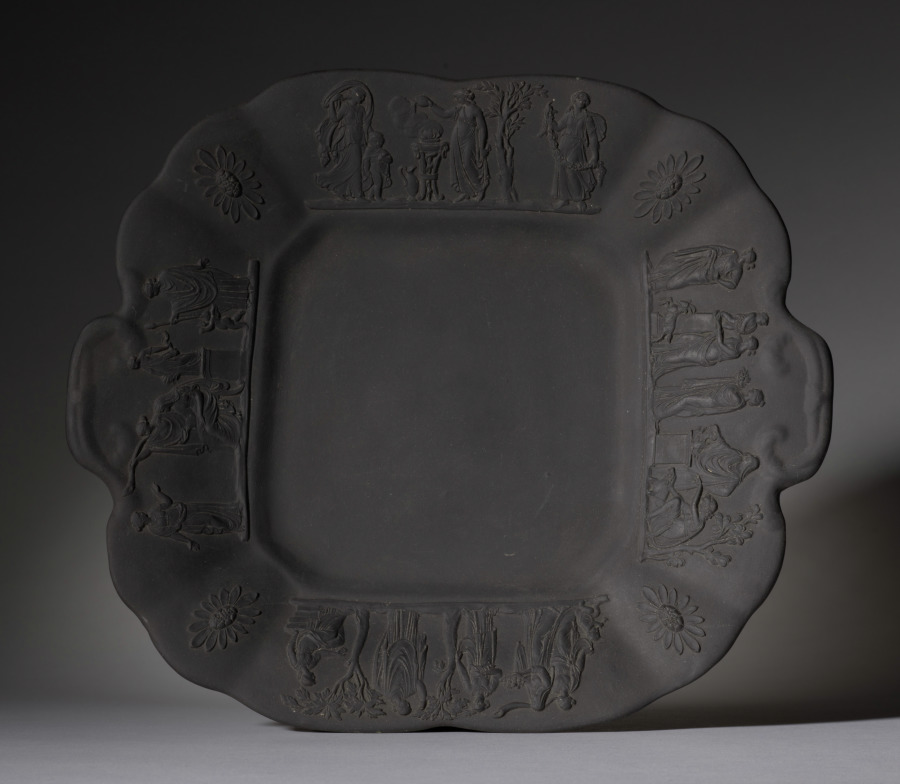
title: Plate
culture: England, Staffordshire, 19th century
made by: Wedgwood Factory (British)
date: 1800s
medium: black basalt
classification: Ceramic